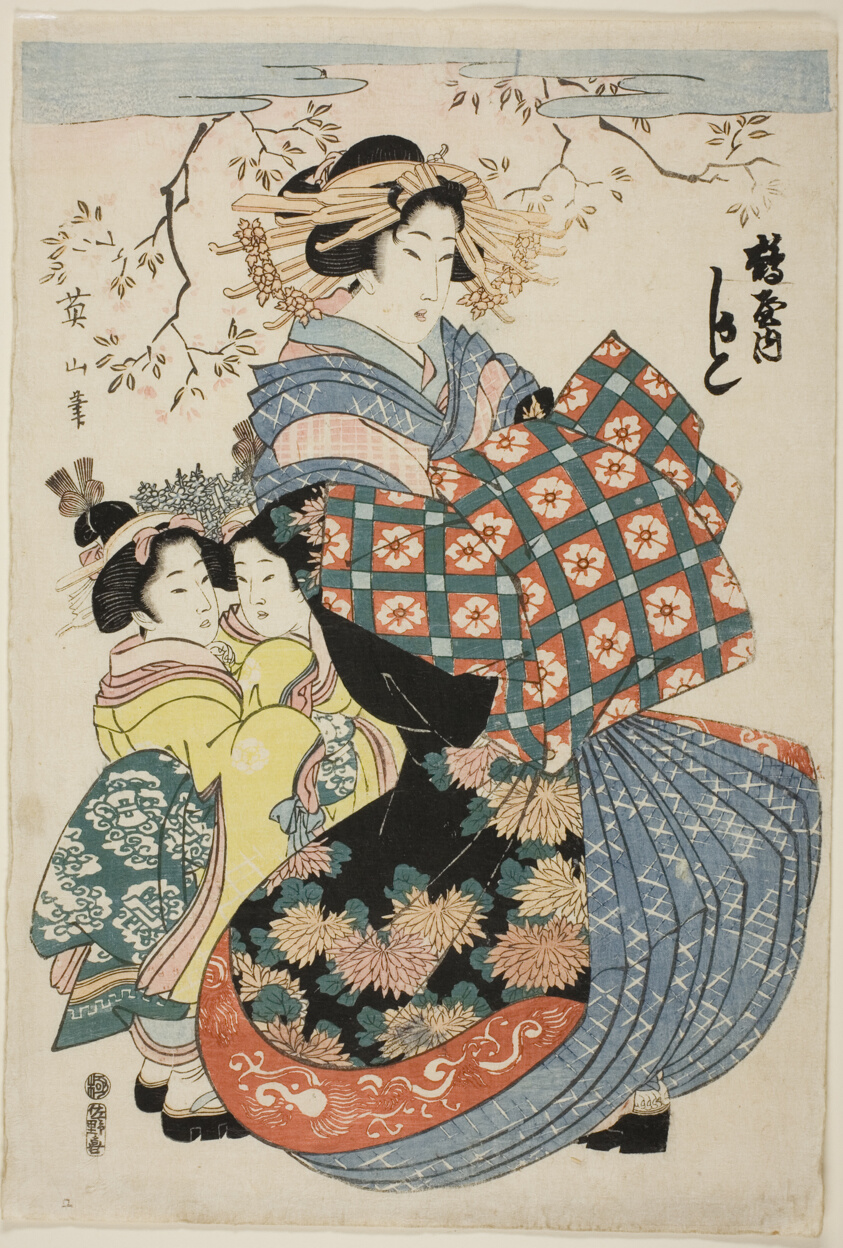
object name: Print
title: The courtesan Kashiku of the Tsuruya with two child attendants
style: Japanese (culture or style), edo (japanese period), Japanism, East Asian, asian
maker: Kikukawa Eizan (Japanese, 1787-1867)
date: c. 1824/29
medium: Color woodblock print; sheet from oban triptych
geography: Japan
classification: woodblock print; print; asian art